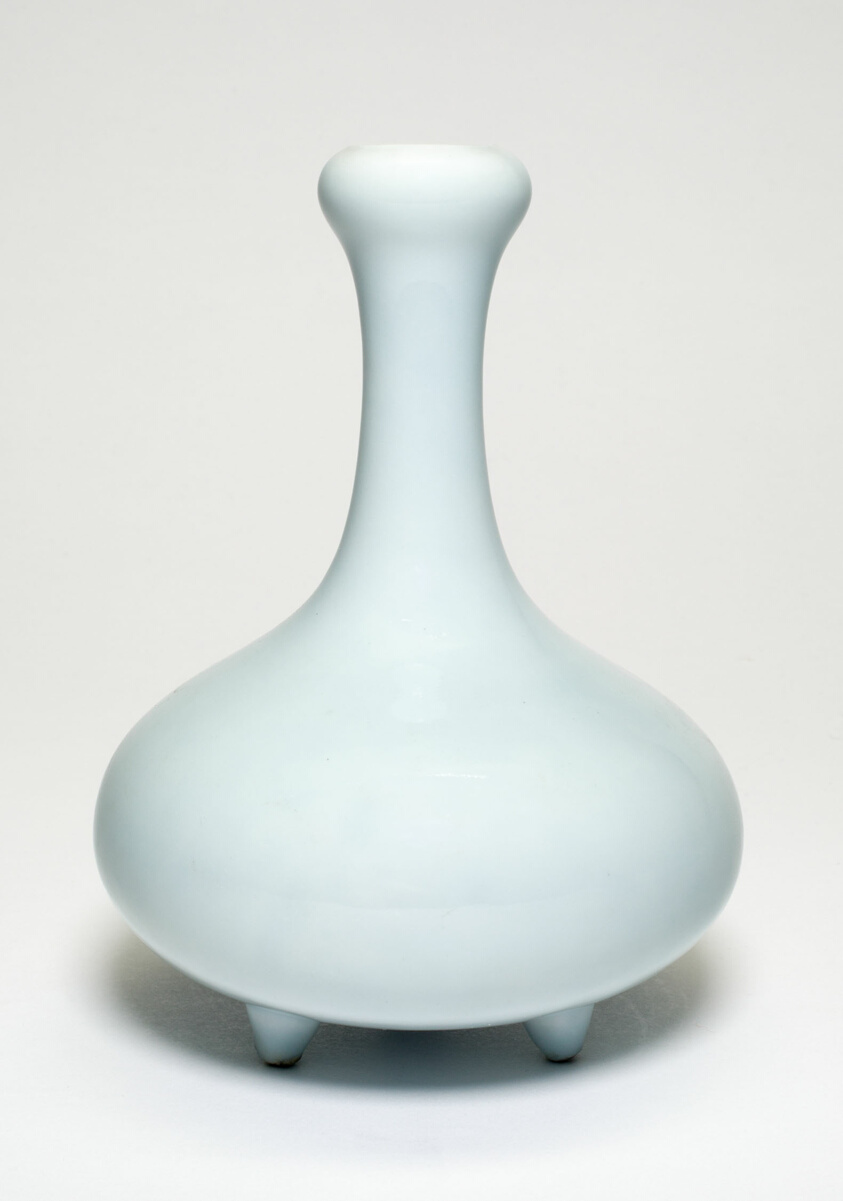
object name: Decorative Arts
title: Bulbous-Shaped Vase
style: Chinese (culture or style)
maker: China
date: Qing dynasty (1644–1911), Qianlong reign mark and period (1736–1795)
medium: Porcelain with clair de lune glaze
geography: China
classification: vase; porcelain; vessel; asian art; ceramics; decorative arts